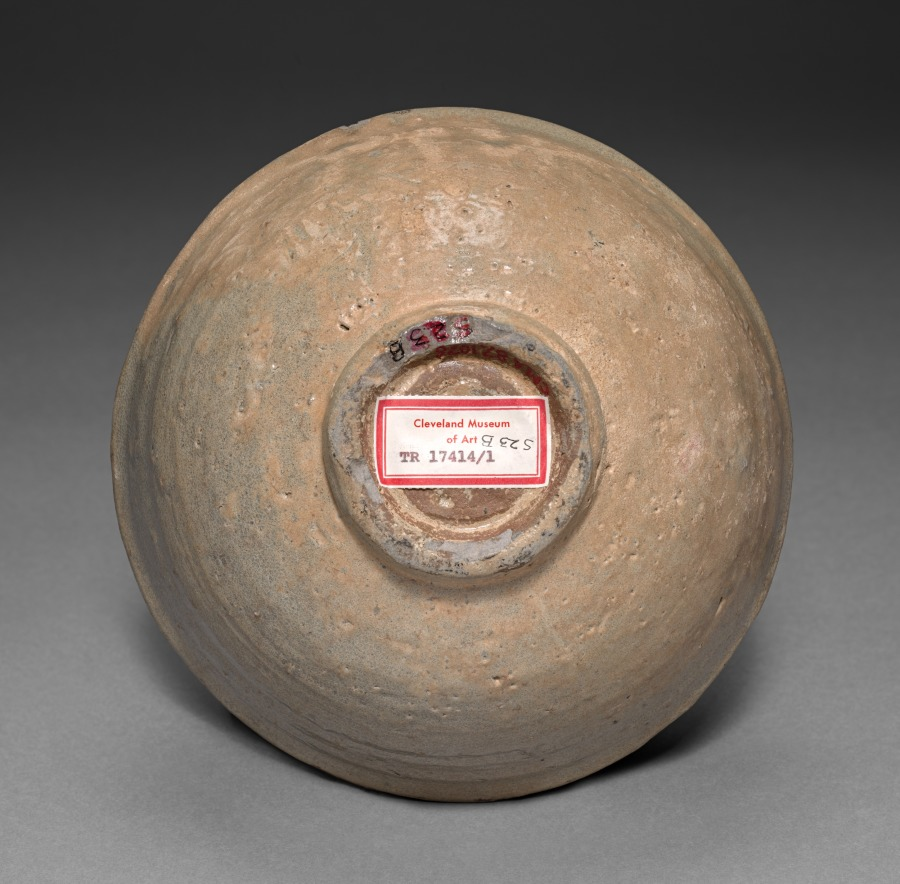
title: Bowl with White-slip Decorations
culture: Korea, Joseon dynasty (1392–1910)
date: 1600s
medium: glazed ceramic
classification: Ceramic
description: This type of wide-mouthed bowl was used every day in Korea, not exclusively for tea drinking. But when it was introduced to Japan around the early 1500s its imperfect appearance evoking the aesthetics of wabi-sabi caused it to be repurposed as a tea bowl. Korean tea bowls were circulated as a item of foreign luxury among Japanese military elites. It's highly possibly this type of bowl was produced in one of the kilns operated by the trading office Busan in Southern Gyeongsang province, and exported to Japan.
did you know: This type of rustic tea bowl was highly appreciated among advanced Japanese practitioners of the tea ceremony.